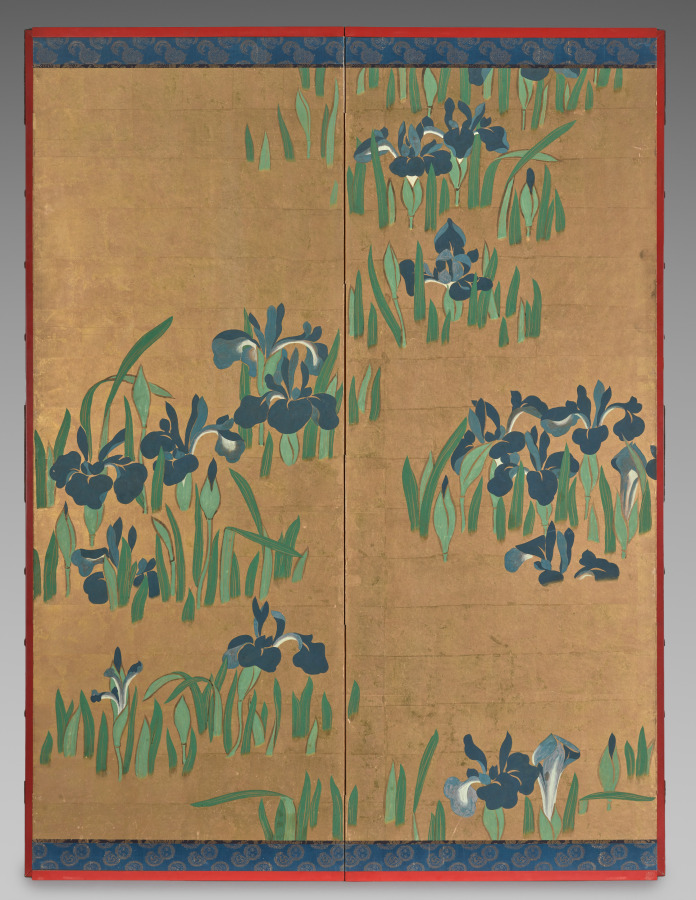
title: Irises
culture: Japan, Edo period (1615–1868)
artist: Watanabe Shikō (Japanese, 1683–1755)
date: 1700s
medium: One of a pair of six-panel folding screens, ink and color on gilded paper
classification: Painting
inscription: signed and sealed lower right of the first panel from the right.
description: The subject of this painting comes from a 10th-century text. It tells of a young nobleman’s journey into the lonely countryside, far from the capital city of Heian-kyō (Kyoto). There he came upon a small stream, the banks of which were covered with blooming irises, on which the artist has chosen to focus our attention. While viewing the beautiful flowers the nobleman composed a poem: I have a beloved wife, Familiar as the skirt of a well-worn robe, And so this distant journeying Fills my heart with grief.